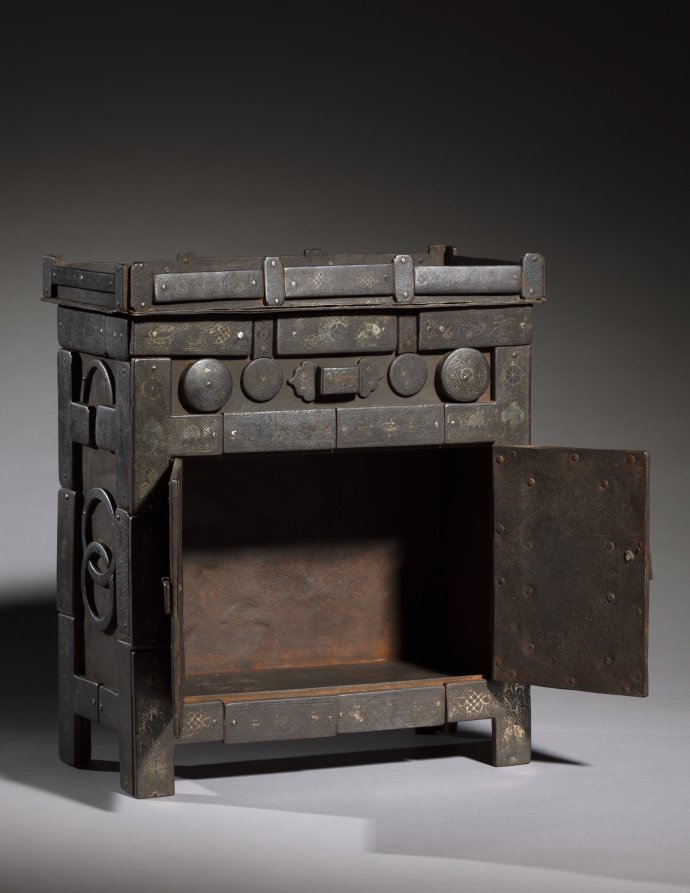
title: Spirit House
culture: Korea, Joseon dynasty (1392–1910)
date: late 1800s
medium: iron inlaid with silver and copper decoration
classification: Metalwork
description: Many homes in premodern Korean society had a memorial shrine for preparing and holding ancestral rites. Placed on the top of a tall chair, this miniature edifice (called the spirit house) served as a temporary residence for visiting ancestral spirits. On the table, a variety of delicacies such as fruits, rice, meat, and wine would be placed to treat those spiritual guests.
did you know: The belief in two types of souls, the spiritual and the corporeal, embodied the core concept of ancestor worship in traditional China and Korea. While the corporeal soul is believed to reside in the tomb, the spiritual soul, in the spirit house, like this example, guards his or her decedents.